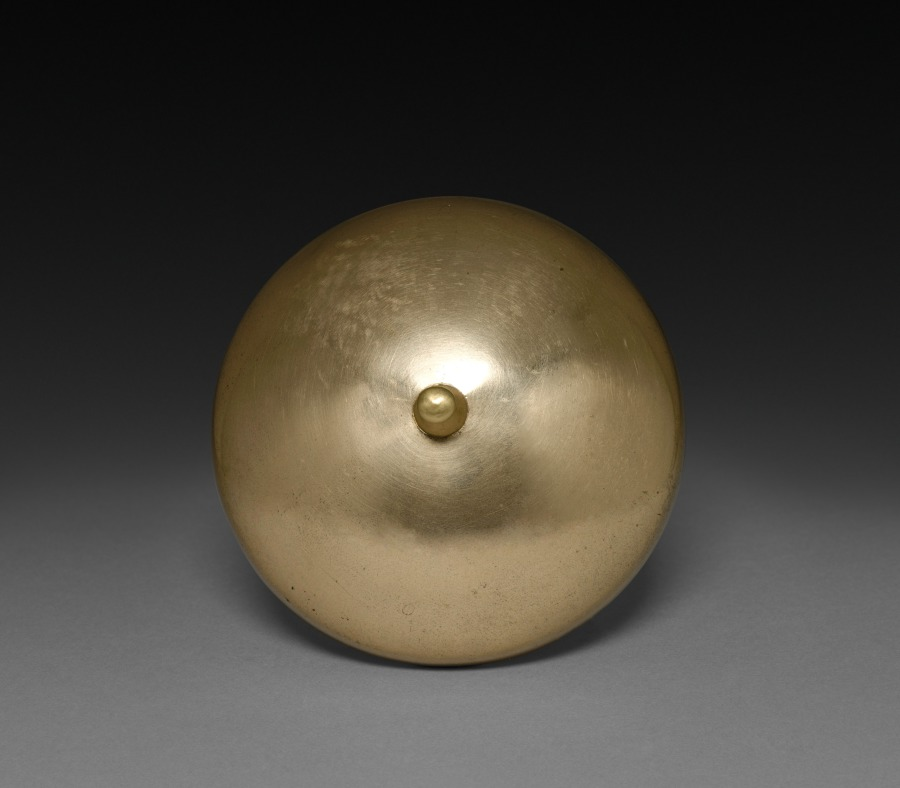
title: Container (lid)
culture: Japan, Meiji period (1868–1912) or Taishō period (1912–26)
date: early 1900s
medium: brass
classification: Metalwork